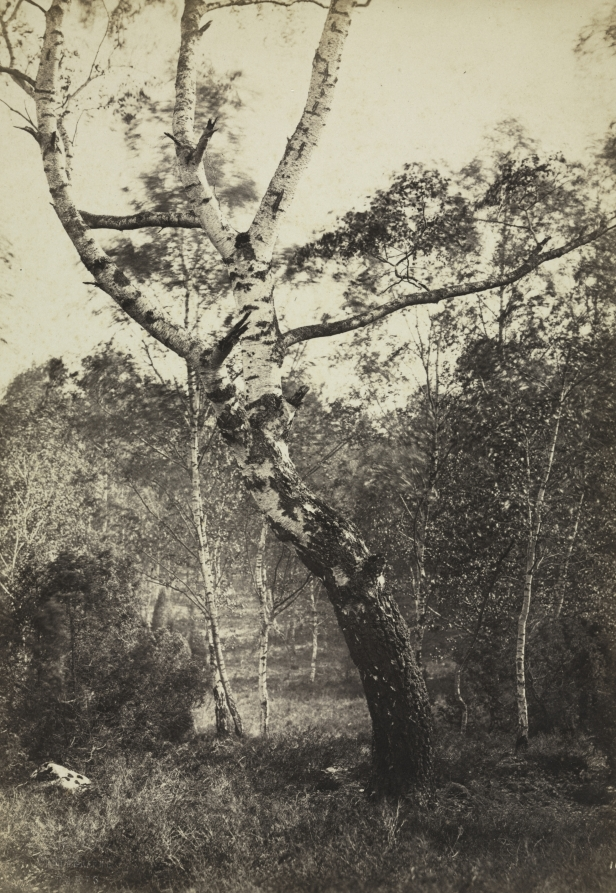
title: Study of a Birch Tree, Barbizon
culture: France, 19th century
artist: Constant Alexandre Famin (French, 1827–1888)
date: 1860s-1870s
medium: albumen print from wet collodion negative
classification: Photograph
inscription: Written in negative: "10[rest cut off]"; in pencil on recto of mount: "101"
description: During his brief career in photography, Famin produced photographic studies of varied motifs, including figures, animals, and elements of landscape, from which young artists learned by copying and seasoned professionals borrowed for their studio compositions. Like an Impressionist painting, this isolated scene of impressive birch trees in the Barbizon forest is animated by a sparkling, dissolving light.